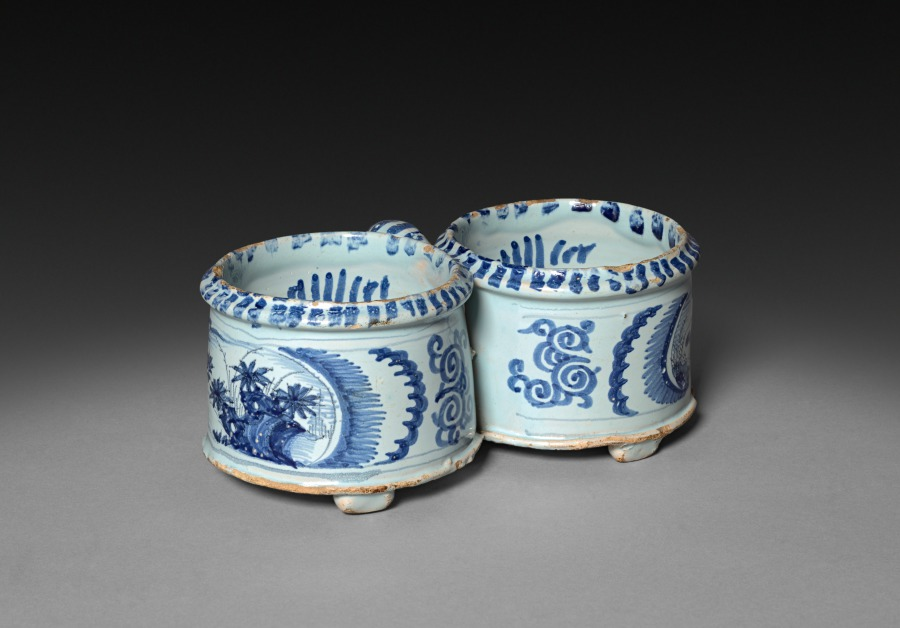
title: Cruet Stand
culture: France, early 18th Century (?)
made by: possibly by Nevers Factory (French)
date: c. 1700 ?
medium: faience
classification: Ceramic